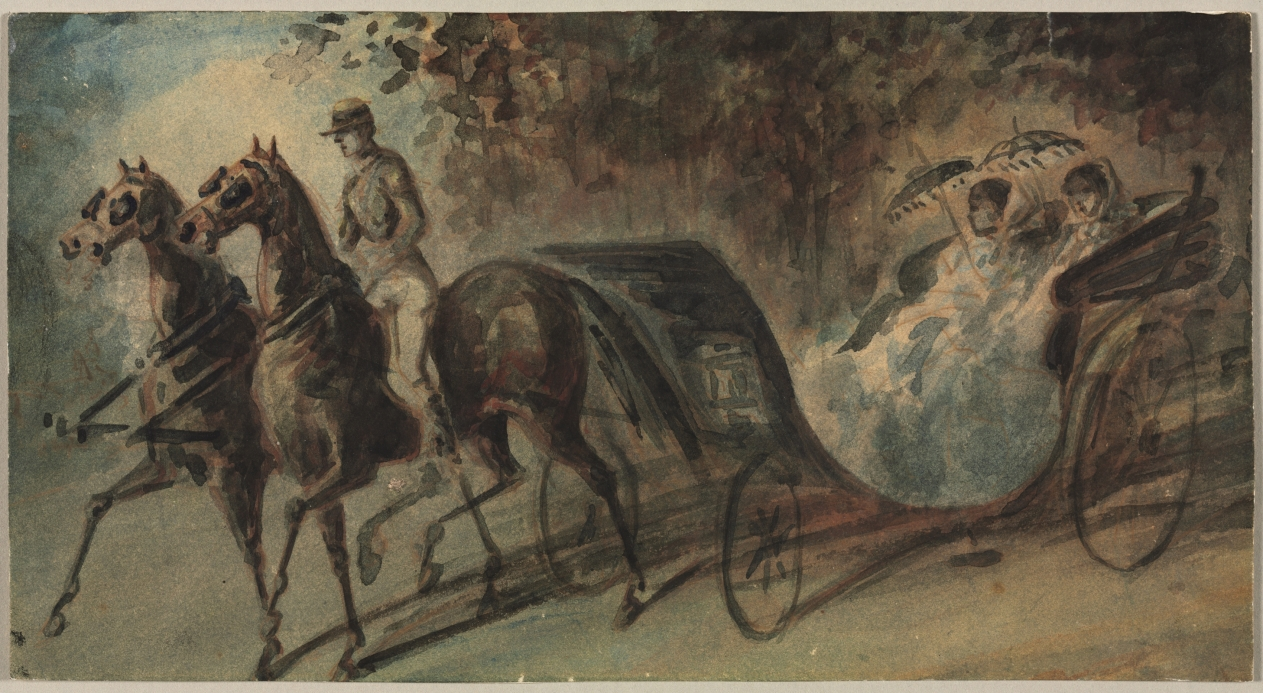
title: Carriage in the Bois de Boulogne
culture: France, 19th century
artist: Constantin Guys (French, 1805–1892)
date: 1800s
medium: watercolor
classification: Drawing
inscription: VERSO OF SECONDARY SUPPORT, lower center, in graphite: 1